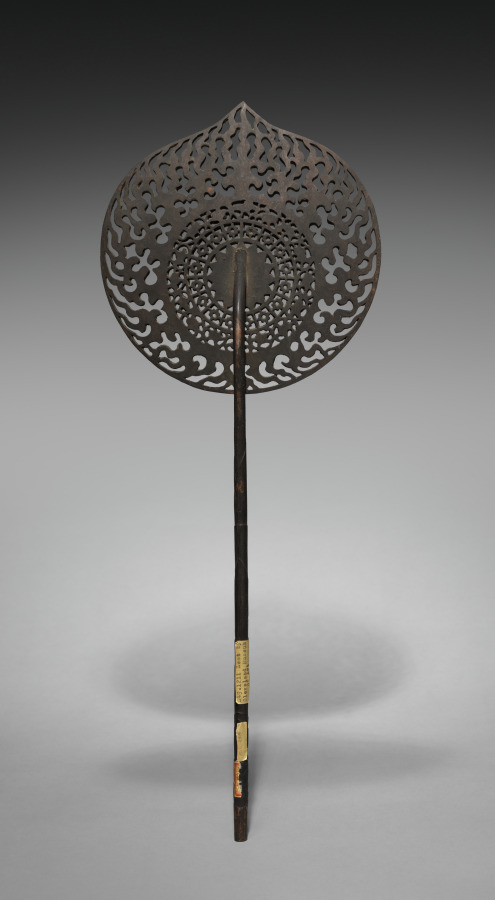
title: Halo for Buddha of the Future (Miroku Bosatsu)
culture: Japan, Asuka period (538–710)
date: late 600s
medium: cast bronze, incised, with traces of gilding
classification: Sculpture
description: Buddhism was introduced to Japan in the sixth century. For early Japanese devotees, Buddhism offered the promise of salvation through faith in the Buddha of the Future, who would appear at the end of the world. The concept of eternal salvation held particular resonance with the Japanese aristocracy, who became the staunchest supporters of this new faith. Small sculptures like this one, with its gentle grace and powerful presence, were popular devotional objects.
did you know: The Sanskrit name of this being, Maitreya, derives from the Sanskrit word for friend, mita.